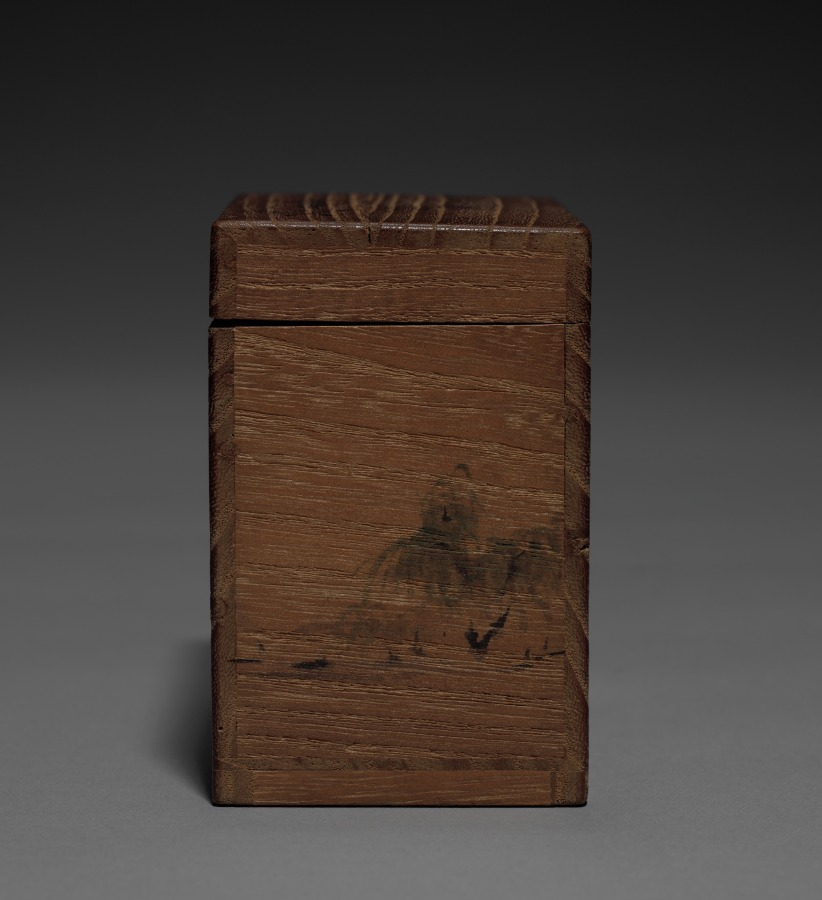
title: Pair of Tea Containers with Plum Blossoms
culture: Japan, Edo period (1615–1868)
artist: Aoki Mokubei (Japanese, 1767–1833)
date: early 1800s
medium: porcelain with underglaze blue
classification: Ceramic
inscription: signed "Ro Mokubei" on base in underglaze blue.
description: Aoki Mokubei, born into a family of restaurateurs, was a potter, calligrapher, painter, and scholar, and is considered one of the three masters of later Edo period Kyoto ceramics. He specialized in porcelains fashioned after Chinese prototypes, and created works for steeped tea (sencha) such as these matching tea caddies decorated in an underglaze blue called sometsuke—literally “with applied dye.” He signed them on their bottoms. They also have intricately patterned silk sleeves to both beautify and protect them. On the exterior of the lid of the outer wooden box that contains them, it is written that Mokubei inscribed and painted an image on the box. On the interior of the lid, the signature and seals of a former owner are written. Mokubei has signed the lid of the inner box, and a charming ink and light color composition of West Lake in Hangzhou in China covers its three sides. On the fourth side is a long inscription by Mokubei describing the scene.